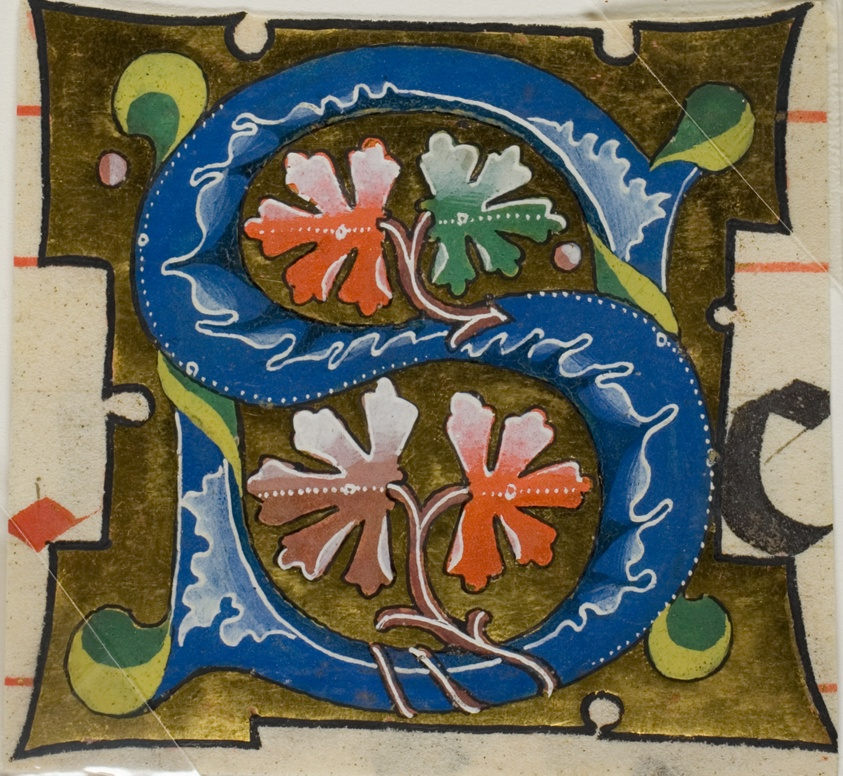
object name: Drawing and Watercolor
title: Decorated Initial "S" with Flowers from a Choirbook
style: medieval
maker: Unknown Artist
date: 19th century imitation of 14th century style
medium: Manuscript cutting in tempera and gold leaf, with red and warm black ink, on vellum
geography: Europe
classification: tempera; manuscript; drawings (visual works); prints and drawing